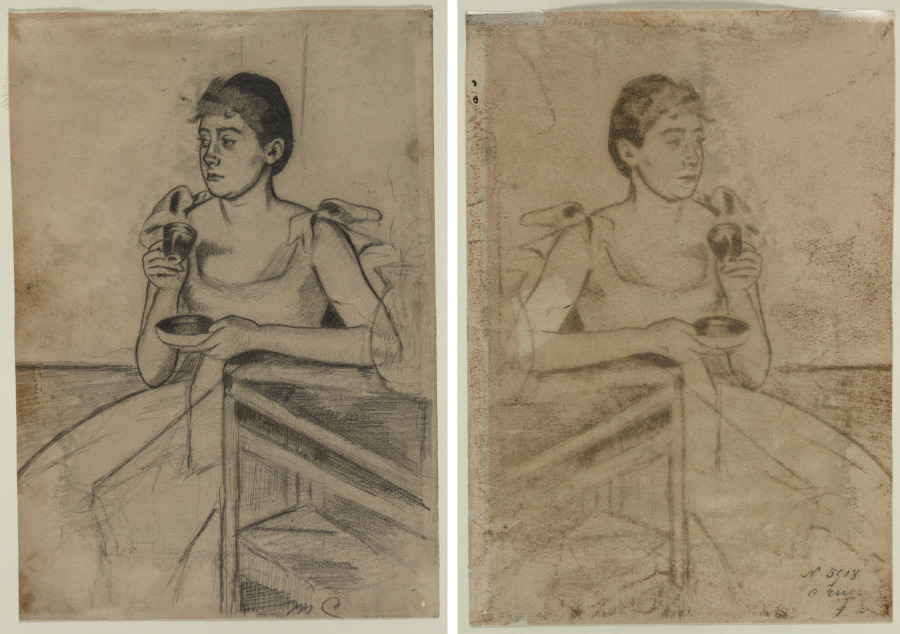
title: After-Dinner Coffee (recto); After-Dinner Coffee (verso)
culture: America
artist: Mary Cassatt (American, 1844–1926)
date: c. 1889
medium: graphite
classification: Drawing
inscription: inscribed in graphite, lower right: "M. C."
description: Cassatt exhibited prints for the first time in 1880 at the fifth Impressionist exhibition. As the decade progressed, she continued to show her graphic work alongside pastels and paintings. In the spring of 1890, at the Deuxième Exposition de Peintres-Graveurs, she showed a group of drypoints, remarkable in their delicacy and precision, as well as a group of prints made with a combination of aquatint and softground etching that appeared quickly drawn and spontaneous. After-Dinner Coffee is a study for a softground etching with aquatint.